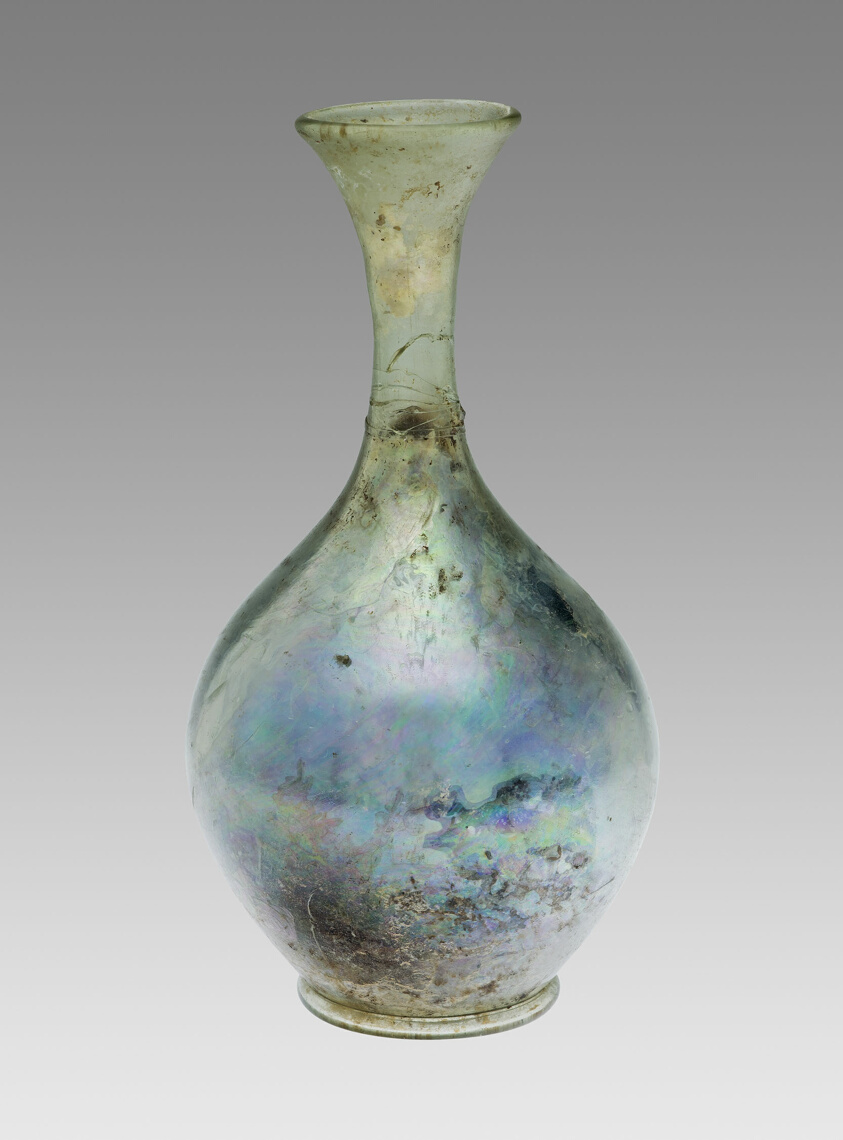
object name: Vessel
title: Bottle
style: syrian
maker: Roman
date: 3rd-4th century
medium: Glass, blown technique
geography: Syria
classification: bottle; glass; vessel; ancient art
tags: containers